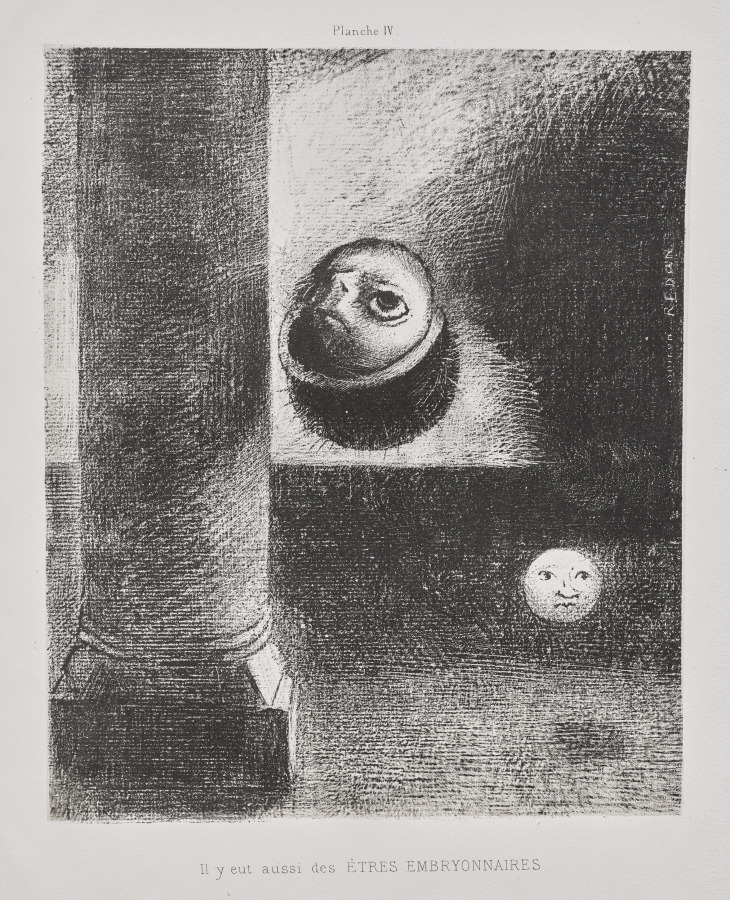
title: There Were Also Embryonic Beings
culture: France, 19th century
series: Homage to Goya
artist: Odilon Redon (French, 1840–1916)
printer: Lemercier & Cie.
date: 1885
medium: lithograph on China paper laid on wove paper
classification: Print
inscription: printed above image at center: Planche IV.; below image at center: Il y eut aussi des ÊTRES EMBRYONNAIRES.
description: This series is one of many that Odilon Redon created throughout his career. Nearly two-thirds of his lithographs took the form of portfolios—prints connected conceptually by a theme or narrative and physically by a folder or binding. Such works were often dispersed over time, but Cleveland was fortunate to acquire several complete sets with their original covers during the 1920s. Dating from Redon’s early experimentation with lithography, Homage to Goya was intended as a tribute to 18th-century Spanish master Francisco de Goya, whose interest in dreams and the subconscious influenced Redon. The six seemingly unrelated images celebrate Goya’s ambiguity and collectively suggest the introspection and isolation of artistic practice.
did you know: This portfolio was published in an edition of 50, one of which Redon sent to poet Stéphane Mallarmé soon after Redon became a frequent participant in a literary salon held regularly at Mallarmé's home.